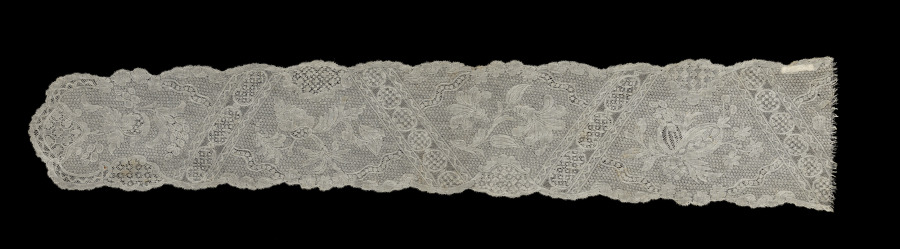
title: Half of a Lace Lappet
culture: Belgium, Binche(?)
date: 1730s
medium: Linen: bobbin lace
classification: Lace